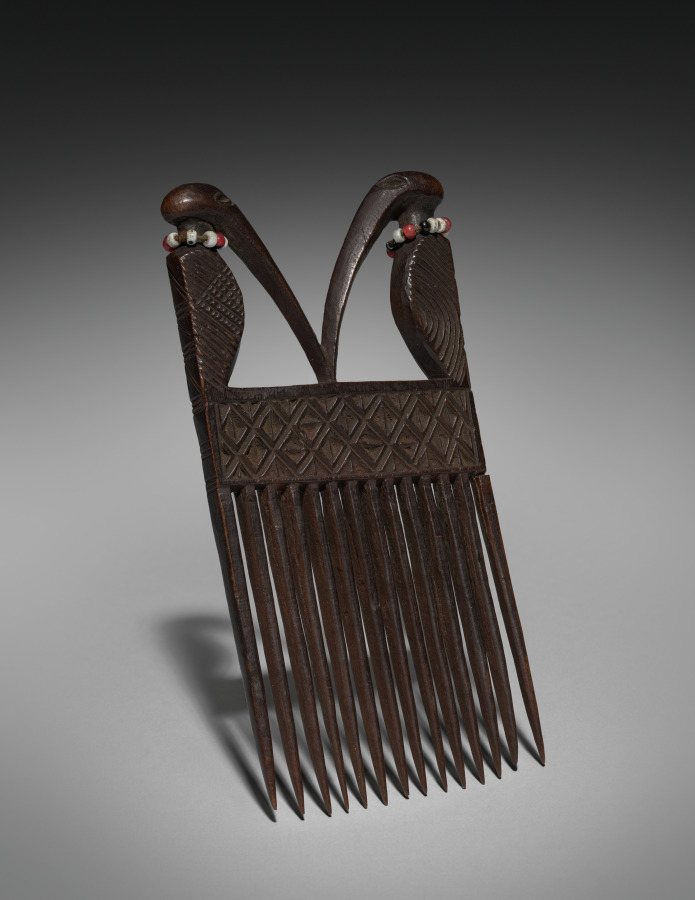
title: Comb (cisakulo)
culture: Africa, Central Africa, Angola, or Democratic Republic of Congo, Chokwe-style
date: mid- to late 1800s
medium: Wood, glass beads, and natural fibers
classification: Jewelry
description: Chokwe women and men inserted finely decorated combs and pins in their hair to signal rank and wealth. Here, as among neighboring peoples, hairstyles reflected changing trends across place and over time. This comb's wooden material and sculptural top made it of a higher value than simple examples made from metal or cane. Its wide teeth were practical, securing elements of a hairstyle in place. The long-beaked ngungu birds with beaded necklaces were a well-known symbol of chiefly power. In addition to being a sign of beauty and good health, a well-styled hairdo also suggests that the wearer relies on the help of others in its creation. Combs were often gifted to women by admirers or husbands to mark important life events. This comb entered the Cleveland Museum of Art's collection in 1915, one year before the museum opened its doors.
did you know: The double birds on this comb are the ngungu, a kind of hornbill linked to hunting and the related power of leaders. They were considered a good omen, and served as mediators between the earthly world and the spiritual one.